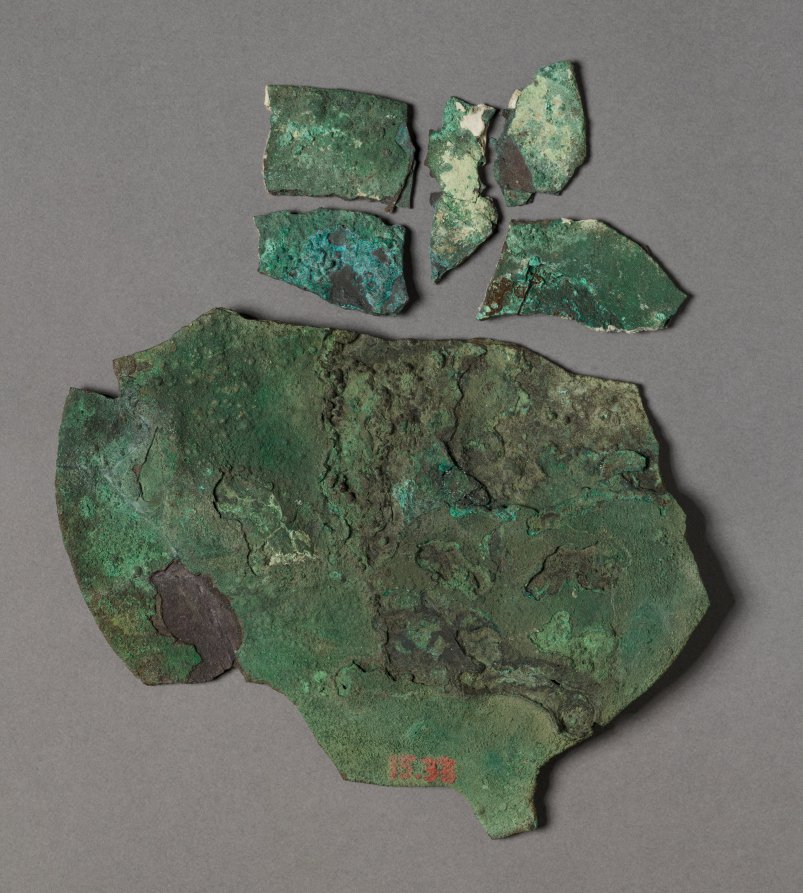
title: Fragment of a Mirror Disk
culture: Egypt, Middle Kingdom (2040–1648 BCE)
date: 2040–1648 BCE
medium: bronze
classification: Cosmetic Objects